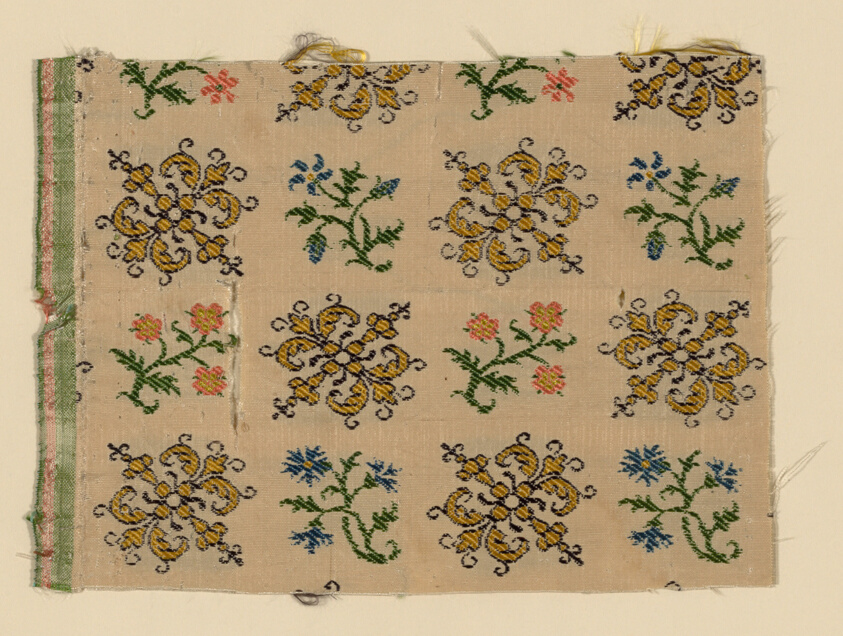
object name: Textile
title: Fragment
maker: Spain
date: 1601/25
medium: brocaded plain cloth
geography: Spain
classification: textile; weaving